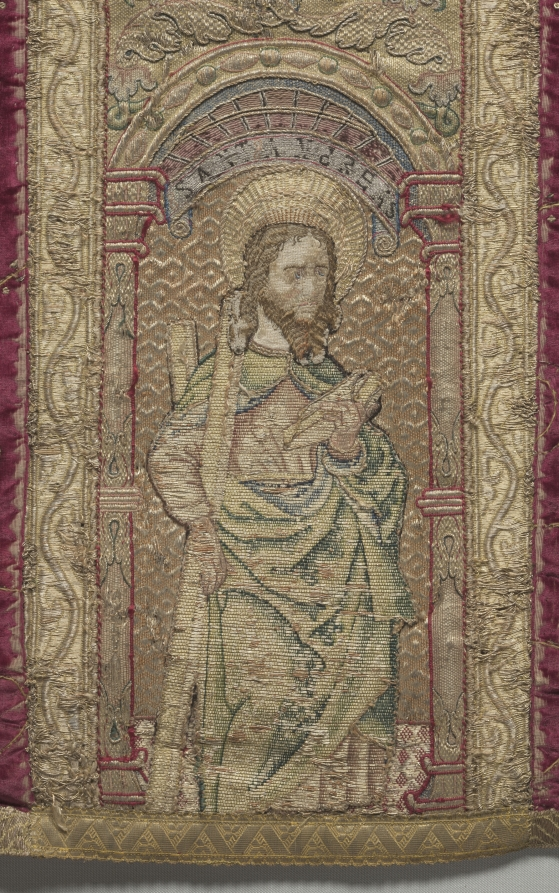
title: Chasuble with Orphrey Band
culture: England, London (embroidery) and Italy, Florence (velvet), early 16th century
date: 1500–1520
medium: Silk, gold thread, sequins; appliqué, embroidery: couching stitches Velvet: solid pile, silk; embroidery: or nué (shaded gold)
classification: Embroidery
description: The English adopted a simpler style of embroidering vestments suitable for mass production around 1500. Isolated motifs, often floral, were embroidered on plain velvet, as in this ecclesiastical chasuble. The orphrey, or embroidered band, in the center depicts Saints Peter, John the Evangelist, and Andrew, identified by their names and attributes (top to bottom). Most of the surface is covered with gold thread sewn down by silk thread passing over it in different densities to create the effect of modeling. Silk thread was also used to embroider areas of skin and hair (mostly disintegrated).